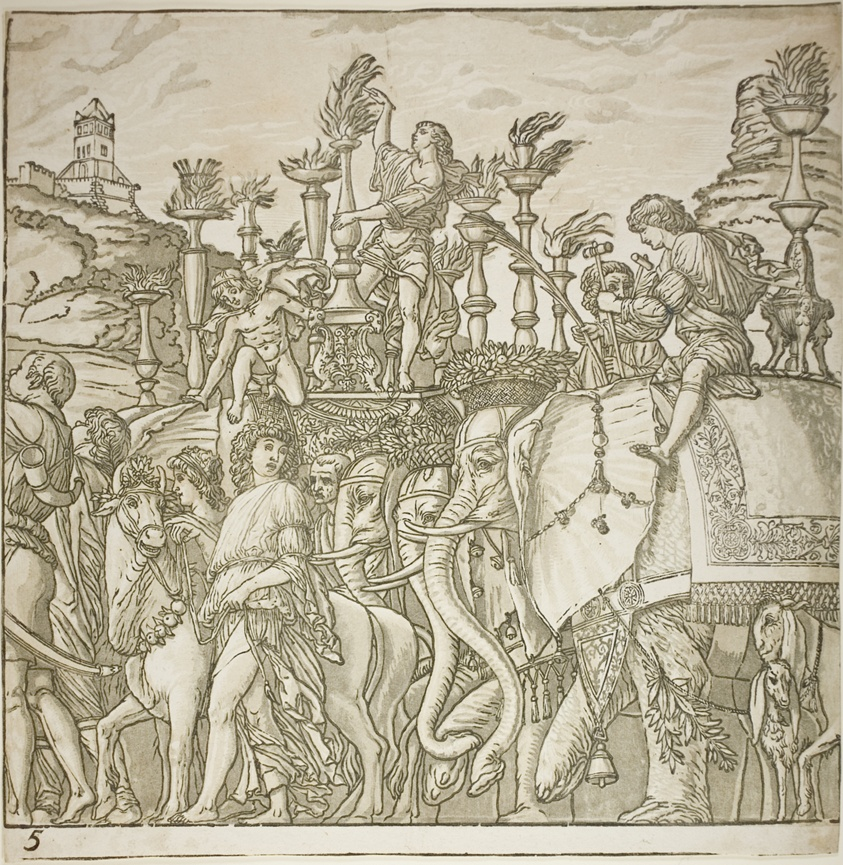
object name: Print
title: Triumph of Caesar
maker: Andrea Andreani (Italian, 1558/59–1629); after Andrea Mantegna (Italian, 1431–1506)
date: 1599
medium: Chiaroscuro woodcut from four blocks in black and light, medium and dark greenish gray on off-white laid paper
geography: Italy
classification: chiaroscuro woodcut; woodcut; print; prints and drawing